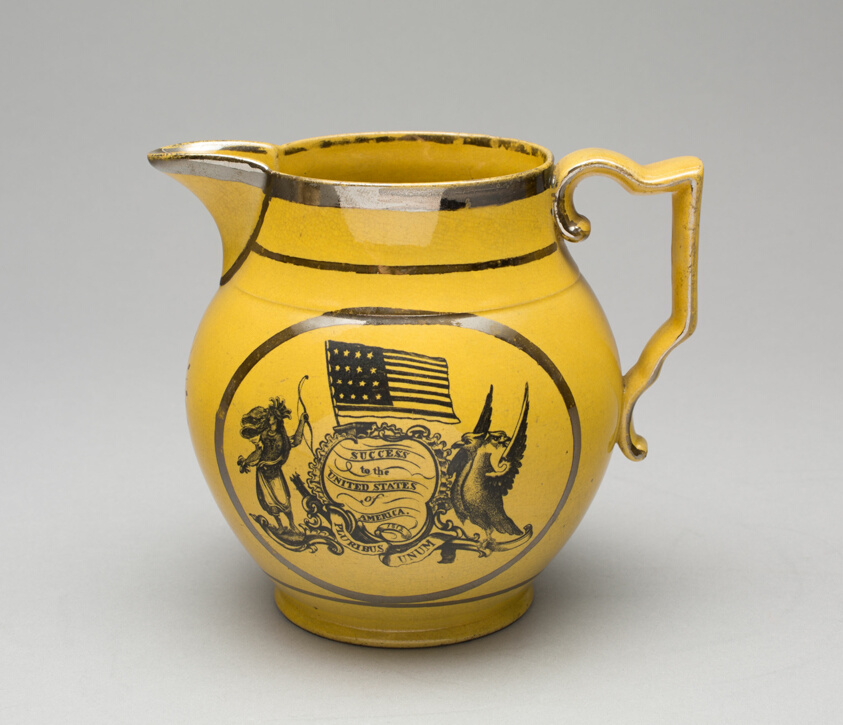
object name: Decorative Arts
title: Pitcher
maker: English for the American market; Staffordshire, England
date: 1810–30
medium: Earthenware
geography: England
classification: pitcher (vessel); earthenware; vessel; american decorative arts; ceramics; decorative arts